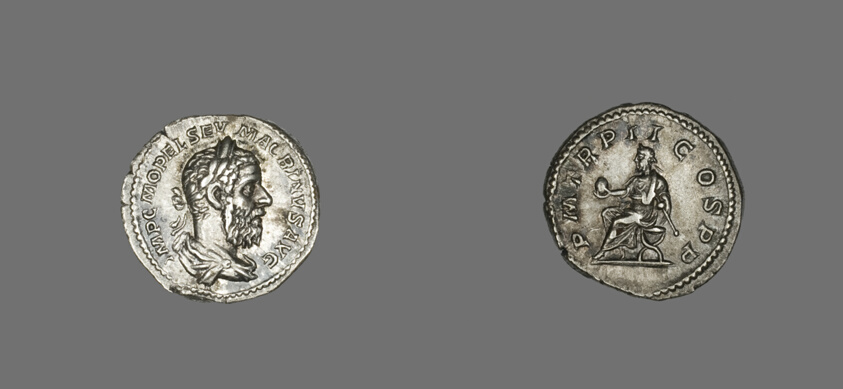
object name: Coin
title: Denarius (Coin) Portraying Macrinus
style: imperial (roman), roman (ancient, style or period)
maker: Roman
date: 217 (December)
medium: Silver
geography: Rome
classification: coin; ancient art